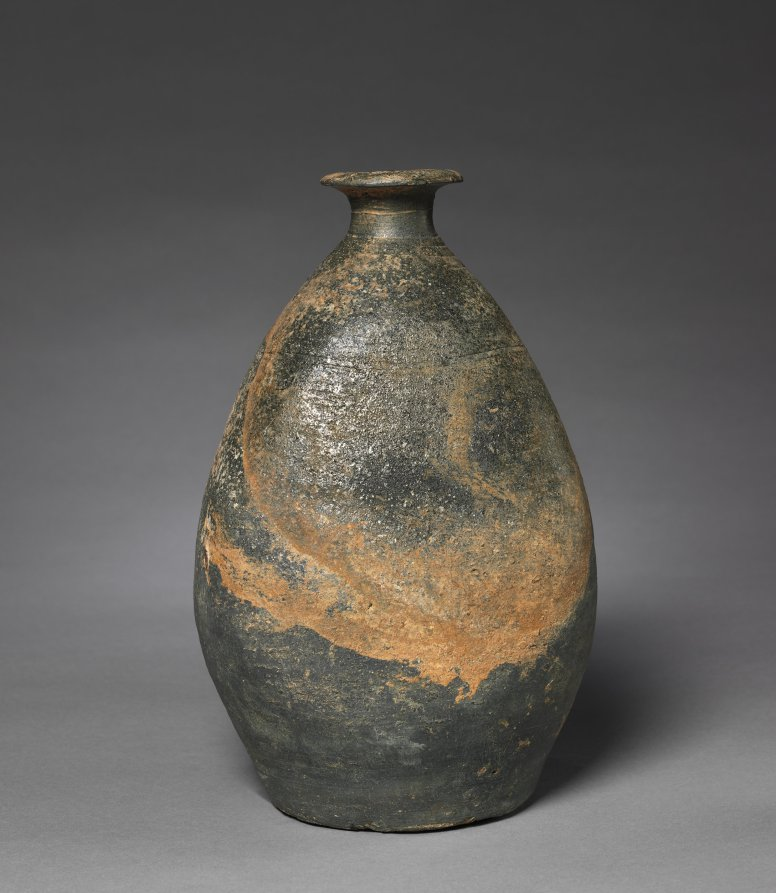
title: Bottle with a Flattened Side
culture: Korea, late Unified Silla (676-935) or early Goryeo (918-1392) period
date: 700s–800s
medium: stoneware with incised designs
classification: Ceramic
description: By the 700s, this type of bottle started to be produced as a utilitarian vessel and was enjoyed among ruling elites. The flattened example like this may have served as a portable wine bottle.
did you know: Its gray color and shimmering glaze both are the result of the reduction of oxygen in the closed kiln chamber built on hillsides.